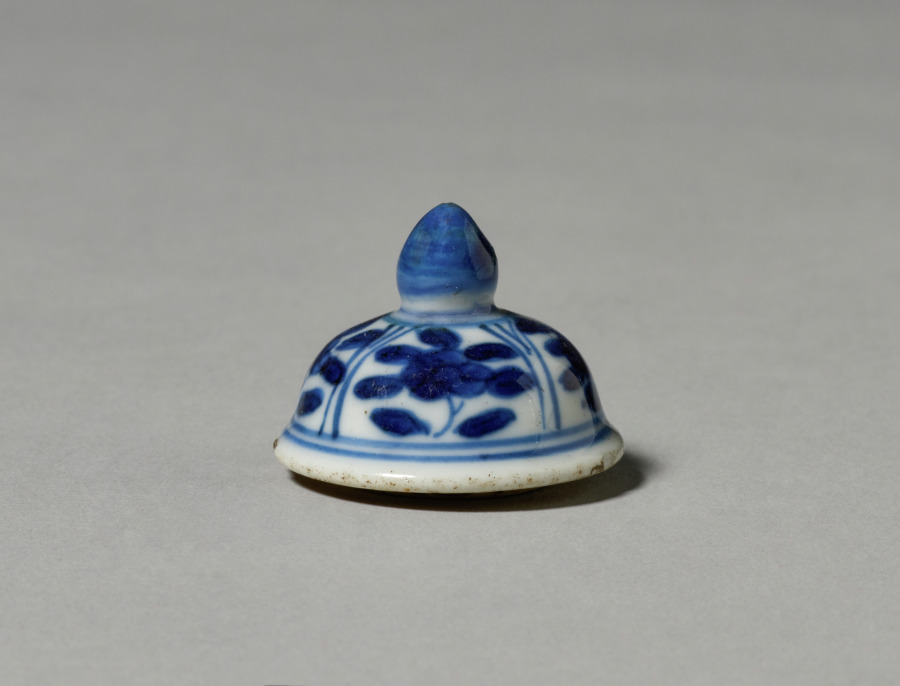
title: Jar with Cover (lid)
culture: China, Qing dynasty (1644-1911)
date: 19th Century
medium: porcelain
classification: Ceramic